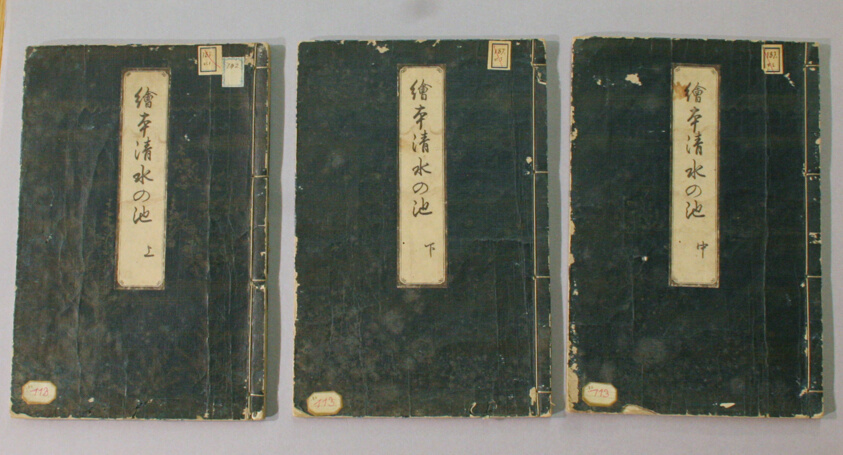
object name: Book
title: Ehon Shimizu no ike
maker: Nishikawa Sukenobu (Japanese, 1671-1750)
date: 1734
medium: Woodblock printed books, three volumes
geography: Japan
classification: book